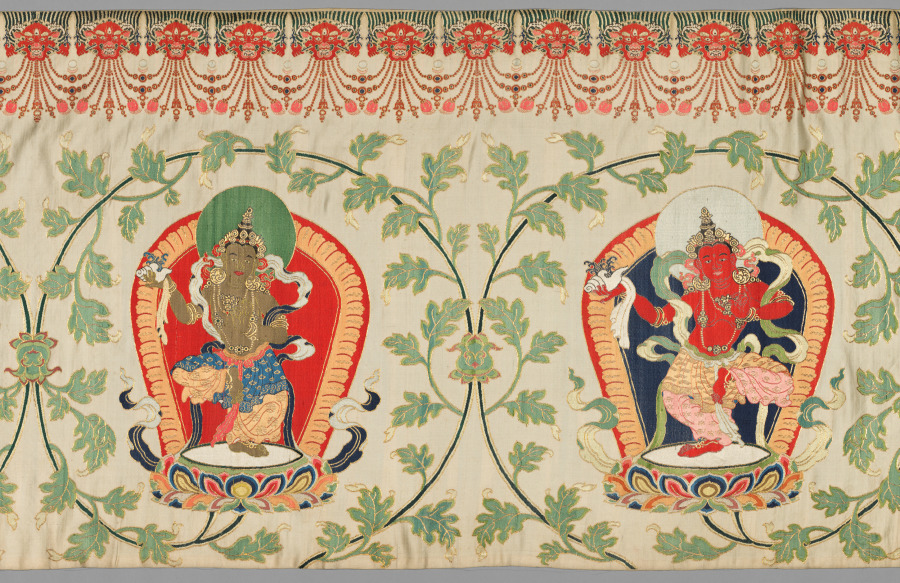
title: Brocaded Strip, known as "Imperial Tribute Brocade"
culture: China, Qing dynasty (1644-1911)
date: c. 1770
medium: brocaded satin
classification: Textile